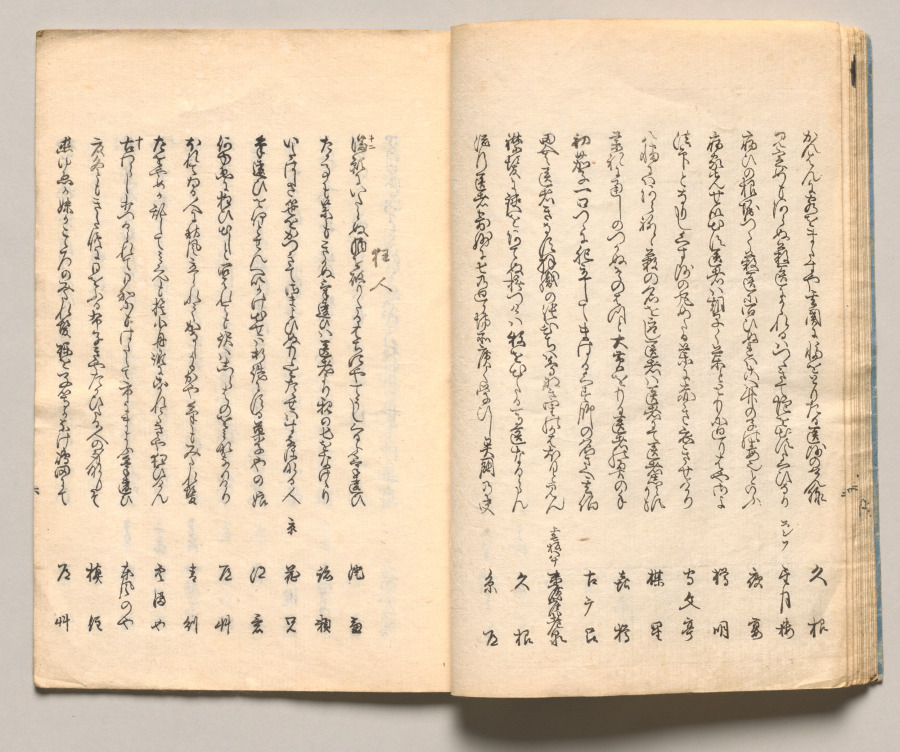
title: Spread Fourteen from Volume One of People of Japan in Light Verse (Kyōka)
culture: Japan, Edo period (1615–1868)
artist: Utagawa Hiroshige (Japanese, 1797–1858)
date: 1857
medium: Woodblock-printed book; ink and color on paper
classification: Bound Volume